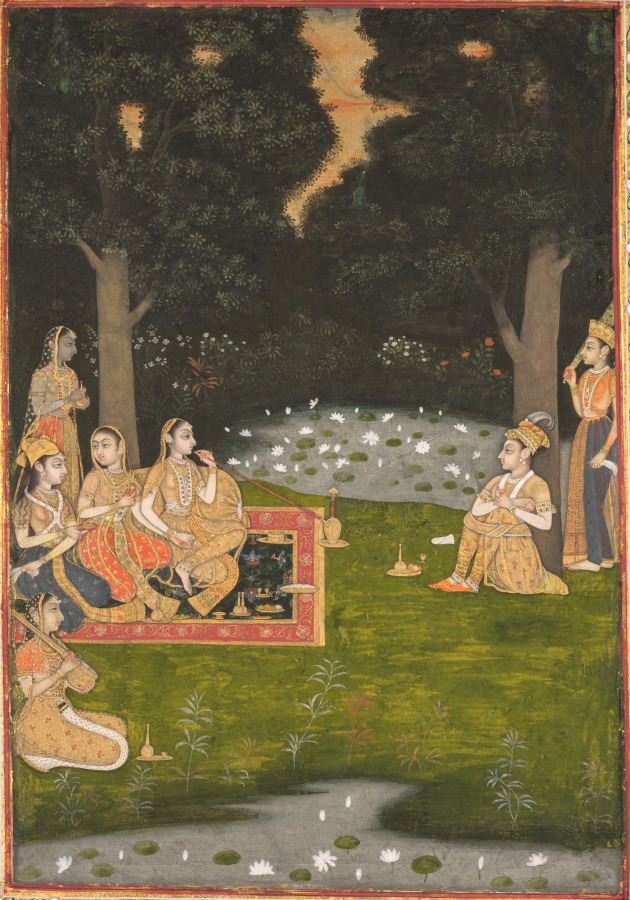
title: Princely ascetic in the forest visited by ladies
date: c. 1760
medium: Gum tempera and gold on paper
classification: Painting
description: At first glance a group of court women has gathered to visit a prince who abandoned the palace to practice yoga, as indicated by the strap around the knees of the figure seated at the right. Upon close inspection, however, the prince is being “played” by a woman dressed for the part. All the components of a pleasurable courtly Mughal gathering are present. A sumptuous carpet, bottles of alcohol, fruit, a hookah, breath-freshening paan, and a woman playing a vina have been set up in the forest as if in the palace.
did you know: Hennaed fingers and jeweled anklets confirm that this prince is a woman.